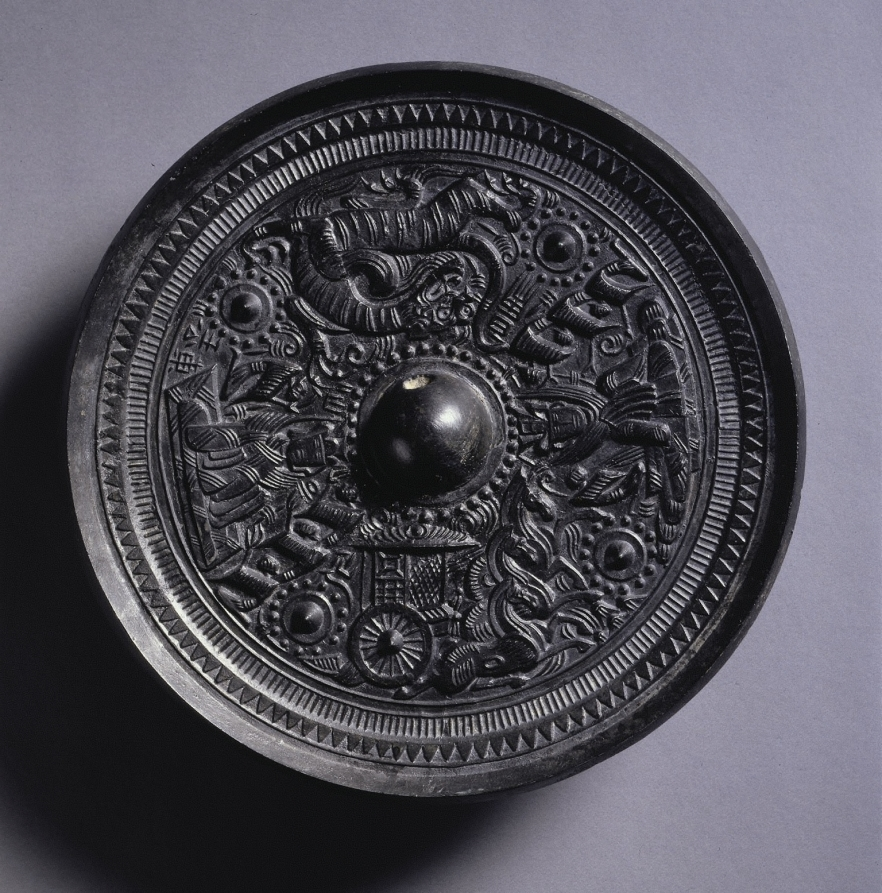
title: Mirror with Deities, Chariot, and the White Tiger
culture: China, Eastern Han dynasty (25–220 CE)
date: 100–200 CE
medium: bronze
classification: Metalwork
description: Depicted on the mirror back are two Daoist deities: the King Father of the East (Dongwanggong) and the Queen Mother of the West (Xiwangmu). Completing the design are the White Tiger of the west (one the Four Spirits representing the four cardinal directions, including the Green Dragon of the east, the Red Bird of the south, and the Dark Warrior of the north) and a chariot drawn by three horses. The reason for the redundancy of two symbolic images relating to the west is not known.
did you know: The meaning of the complex imagery on this mirror's back is not fully understood.